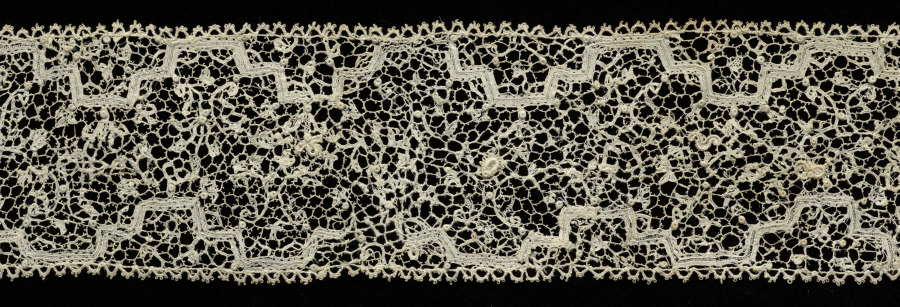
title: Lace Lappet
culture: Italy, Venice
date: 1600s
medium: Linen: needle lace (Punto Corallina)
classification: Lace